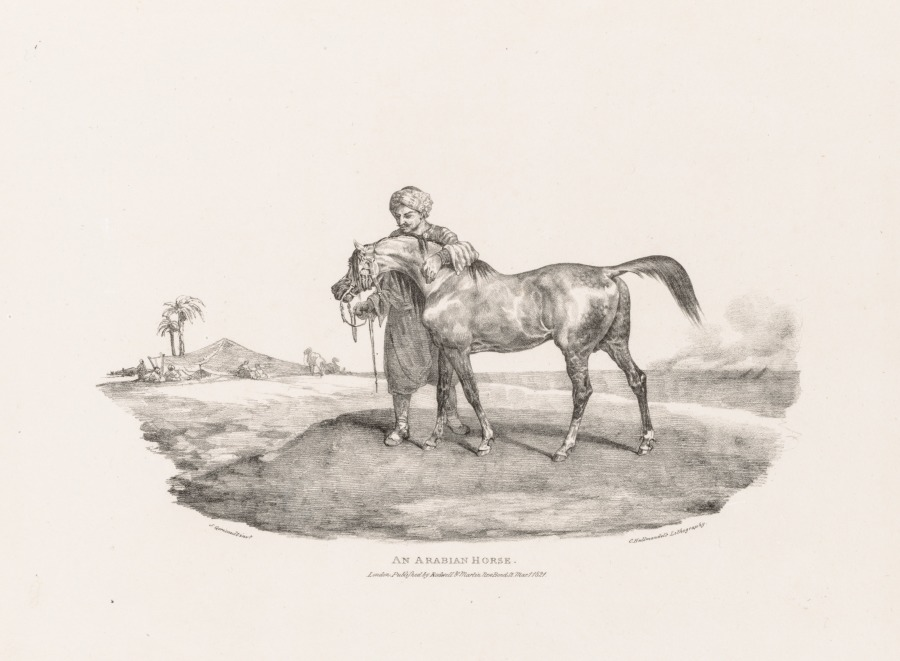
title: Various Subjects Drawn from Life and on Stone: An Arabian Horse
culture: France, 19th century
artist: Théodore Géricault (French, 1791–1824)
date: 1821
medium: lithograph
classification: Print